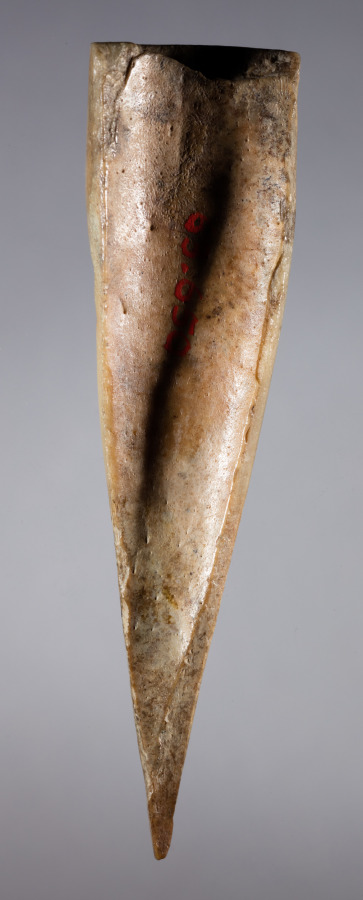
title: Figurine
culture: Iran, early Islamic period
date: 700s–900s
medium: bone, carved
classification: Miscellaneous